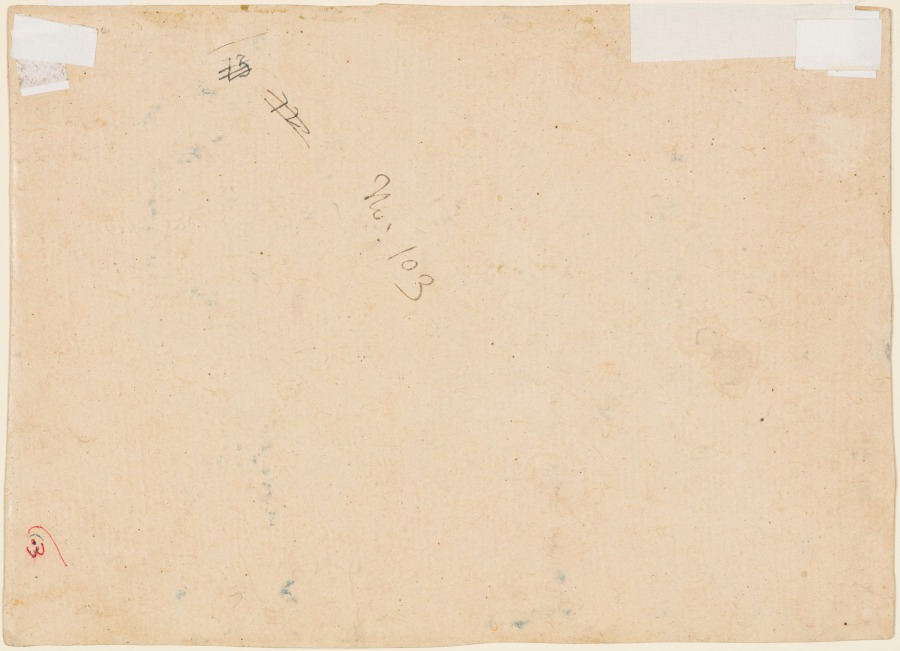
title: Maharana Jagat Singh II of Mewar (r. 1734–51) Dressed as a Bhil, Hunting Deer at Night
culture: Northwestern India, Rajasthan, Rajput Kingdom of Mewar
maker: attributed to Chokha (Indian, active c. 1799–1824)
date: c. 1735–40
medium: gum tempera, ink, and gold on paper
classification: Painting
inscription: gatālā (?) rī sakāra mhārānā śrī jagata siṃgha jī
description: The ruler, who has the title Maharana, wears the leaf skirt of the Bhil people of Western India, as he hunts deer with a female tracker. They both wear a girdle of bells to scare the quarry out of the underbrush, and she illuminates them using directed light from a lamp in a pot. The king has shot a deer in the neck; rabbit, antelopes, and boar scamper away.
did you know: A woman also wearing a leaf skirt roasts kabobs on a three-pronged fork for a midnight snack on the riverbank.